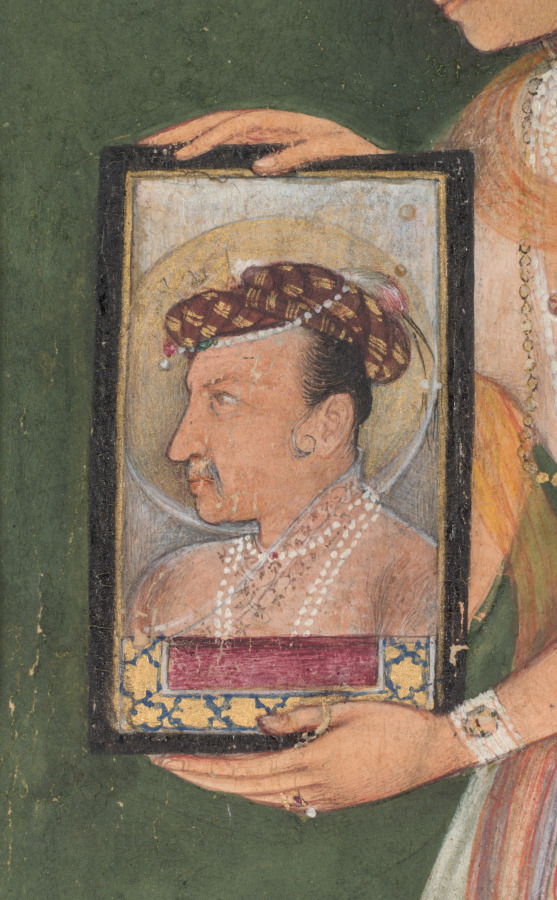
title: Nur Jahan holding a portrait of Emperor Jahangir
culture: Mughal India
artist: attributed to Bishandas (Indian)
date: c. 1627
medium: gum tempera and gold on paper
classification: Painting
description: A woman identified as the favorite wife of the Mughal emperor Jahangir (reigned 1605–27) holds a formal portrait of her husband. He appears aged with graying facial hair behind the jharokha carpet that marks imperial presence. This painting may be modeled on a work depicting Jahangir holding a portrait of his deceased father, showing himself to be the legitimate successor. Nur Jahan, who handled most of the affairs of state, hoped to remain in power after his death. She is depicted in her idealized youth, since she would have been 50 years old when Jahangir died.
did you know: Jahangir died at 58, outliving his younger brothers by about 25 years.